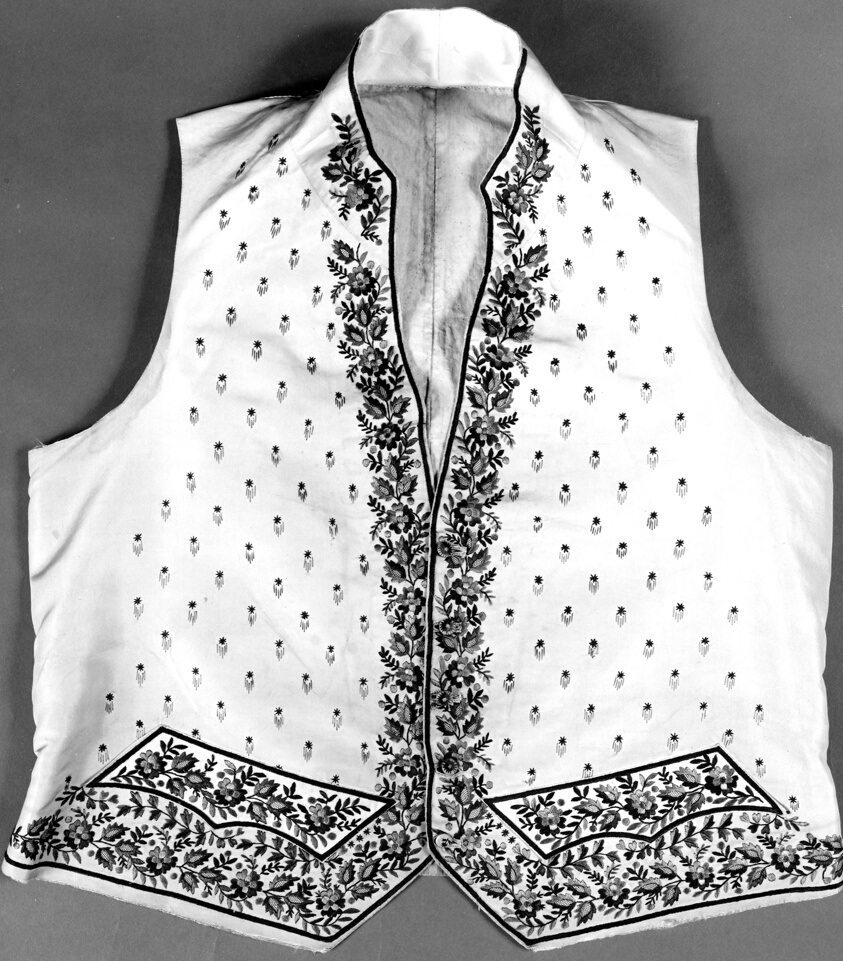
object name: Costume and Accessories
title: Man's Waistcoat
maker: France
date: 18th century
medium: Silk, plain weave, predominant warp, weft-ribbed plain weave; embroidered with silk in satin, single satin, split, star, and stem stitches; insets of cotton, bobbin twist net; back silk, plain weave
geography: France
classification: textile; costume; needlework (visual works); dress (garment); clothing